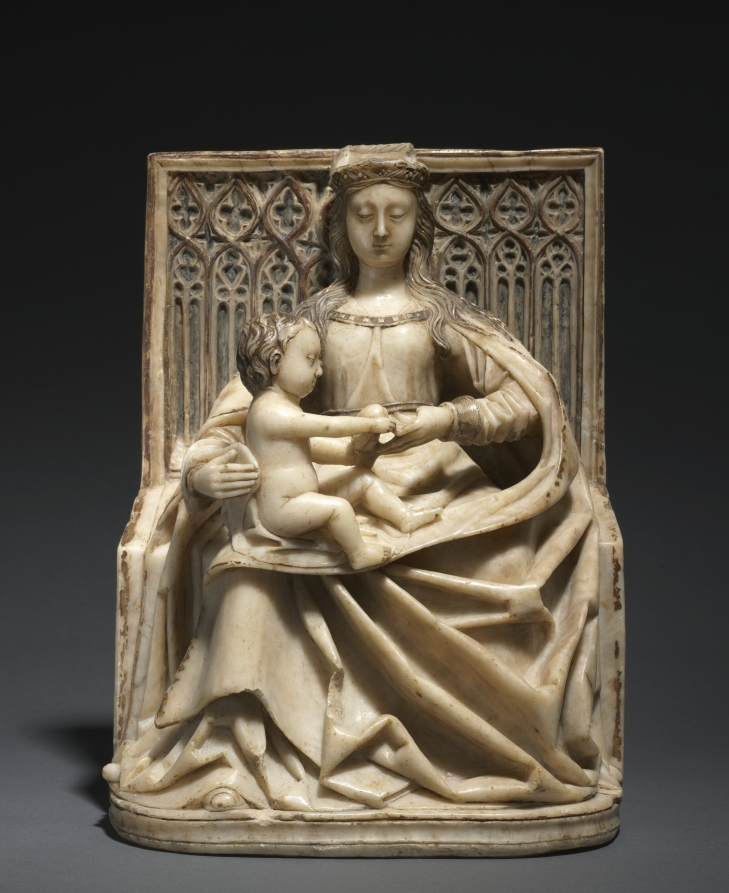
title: Enthroned Virgin and Child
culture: Spain, Burgos, 15th century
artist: Gil de Siloé (Spanish, active c. 1475–1505)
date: c. 1480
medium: alabaster with traces of gilding and polychromy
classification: Sculpture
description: The seated Virgin Mary with Christ is one of the most popular themes in Christian art of the Middle Ages. Alabaster was an ideal material to depict the fleshiness of Jesus, the lush folds of Mary’s cloak, and the fine details of the throne and gown. Christ is reaching for something in his mother’s hand that is now unrecognizable because alabaster tends to break or wear away quickly. It may have been a book or a piece of fruit. Given its small size, it is likely that this sculpture was intended for private use.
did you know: This sculpture was possibly made for Queen Isabella, the Spanish ruler who sponsored Christopher Columbus.